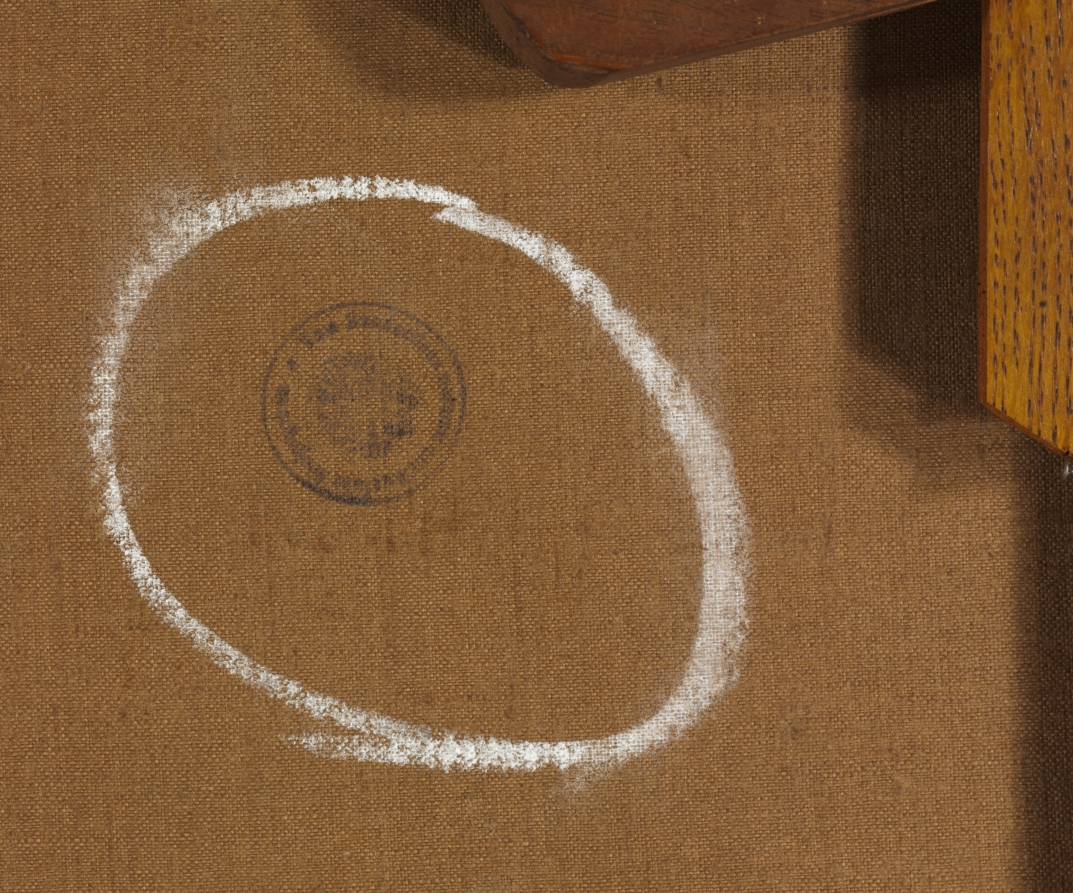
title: Ruins in a Rocky Landscape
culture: Italy, 17th century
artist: Salvator Rosa (Italian, 1615–1673)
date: c. 1640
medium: oil on canvas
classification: Painting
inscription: Signed lower right: "SR [monogram]"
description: In 1635, Rosa left his native Naples for Rome, the undisputed art center of the 17th century, where a new type of landscape painting was emerging, distinguished by the effects of light and atmosphere. Rosa’s fame grew quickly as a painter of landscapes that conjured the beauty and fertility of the Bay of Naples. Ruins in a Rocky Landscape incorporates classical ruins, iridescent reflections of light, and a pastoral tone evoked by the idling shepherds, exemplifying the work that earned Rosa his early fame. The dark, dramatic rocks that rise along the left foreshadow the wildness that Rosa would cultivate in his later sublime landscapes.